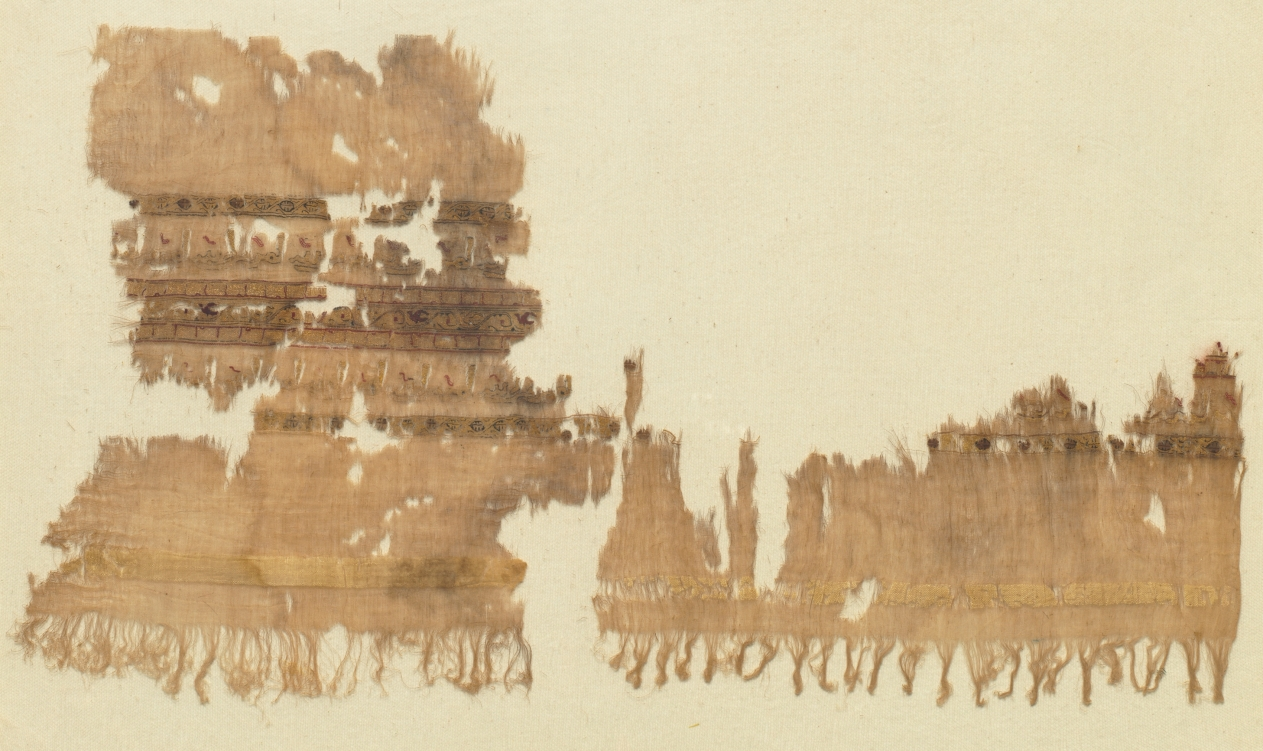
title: Tiraz with gold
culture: Egypt, Fatimid period, reign of Caliph al-Musta‘lī, 1094–1101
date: 1094 – 1101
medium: plain weave with inwoven tapestry weave: linen, silk, and gold filé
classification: Textile